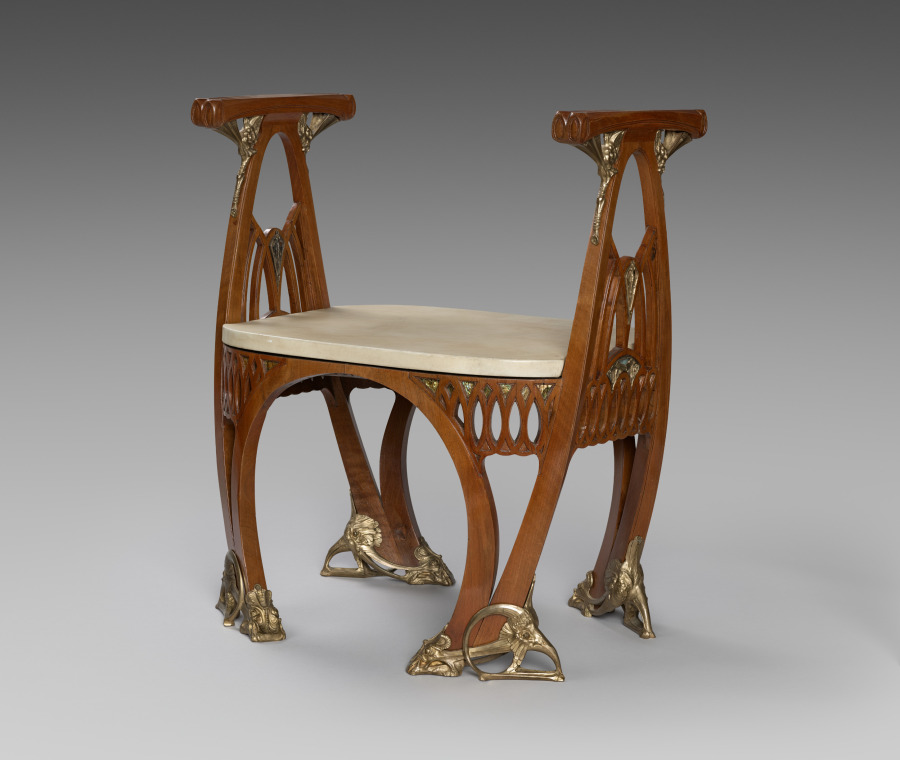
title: Tabouret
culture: France, Paris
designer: Carlo Bugatti (Italian, 1856–1940)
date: c. 1907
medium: Mahogany, parchment, gilt bronze, mother-of-pearl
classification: Furniture and woodwork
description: Although this tabouret is undocumented, its design, with its interlaced ovoid forms, gilt cast metal mounts, and mother-of-pearl inlays, is so close in style to the Cleveland Museum of Art’s celebrated tea table (1991.45) that it too can be assigned to Bugatti's Parisian period and dated about 1907.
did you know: Carlo Bugatti's son Ettore founded the luxurious car company Bugatti Automobiles.